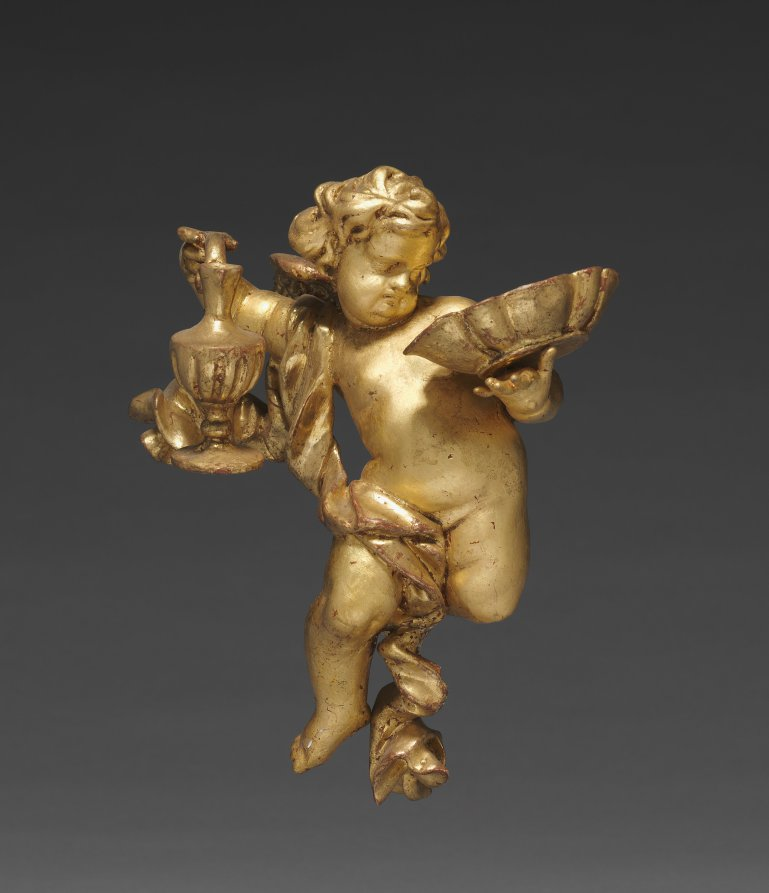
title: Altarpiece with Relics - Putto with Ewer, upper left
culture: Germany, Bavaria, 18th century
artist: Joseph Matthias Götz (German, 1696–1760)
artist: and Workshop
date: c. 1735–40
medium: gilded wood, with relics in niches: gilded wood, mother-of-pearl, ebony, red silk, gold wire, seed pearls, rock crystal, pen and ink on paper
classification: Sculpture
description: Götz covers every surface in gold leaf, giving each part of the object equal importance, rather than simply framing a central picture. In this distinctively Central European approach, figural narrative is subordinate to the overall ensemble. Götz designed this object to rest on top of an altar, probably in front of a larger painted or sculpted decorative scheme. The work contains relics seen through the small windows on the perimeter. These small remains of holy figures demonstrate the persistence of a medieval Catholic tradition well into the 1700s.